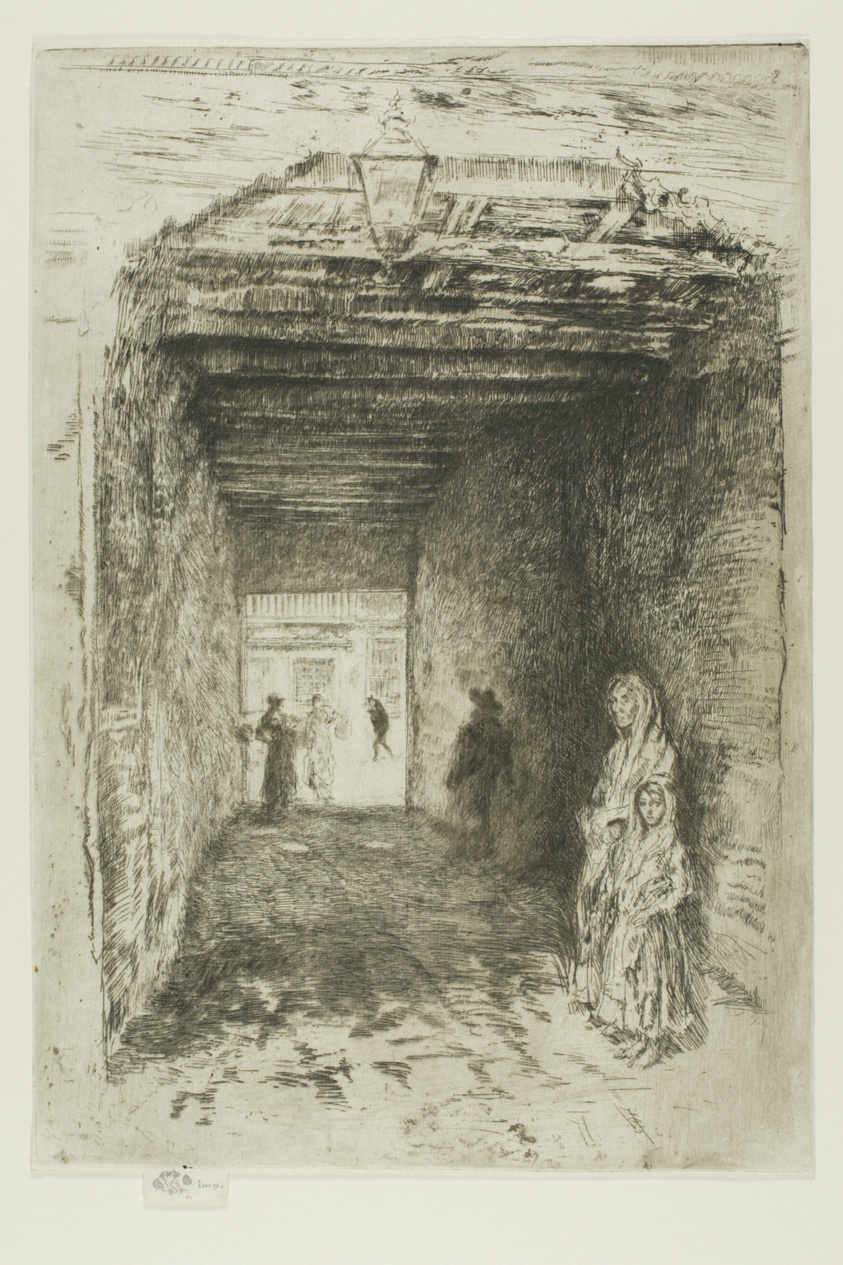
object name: Print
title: The Beggars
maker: James McNeill Whistler (American, 1834-1903)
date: 1879/80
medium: Etching and drypoint with foul biting in black ink on off-white laid paper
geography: United States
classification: etching; foul biting; print; prints and drawing; drypoint; paper